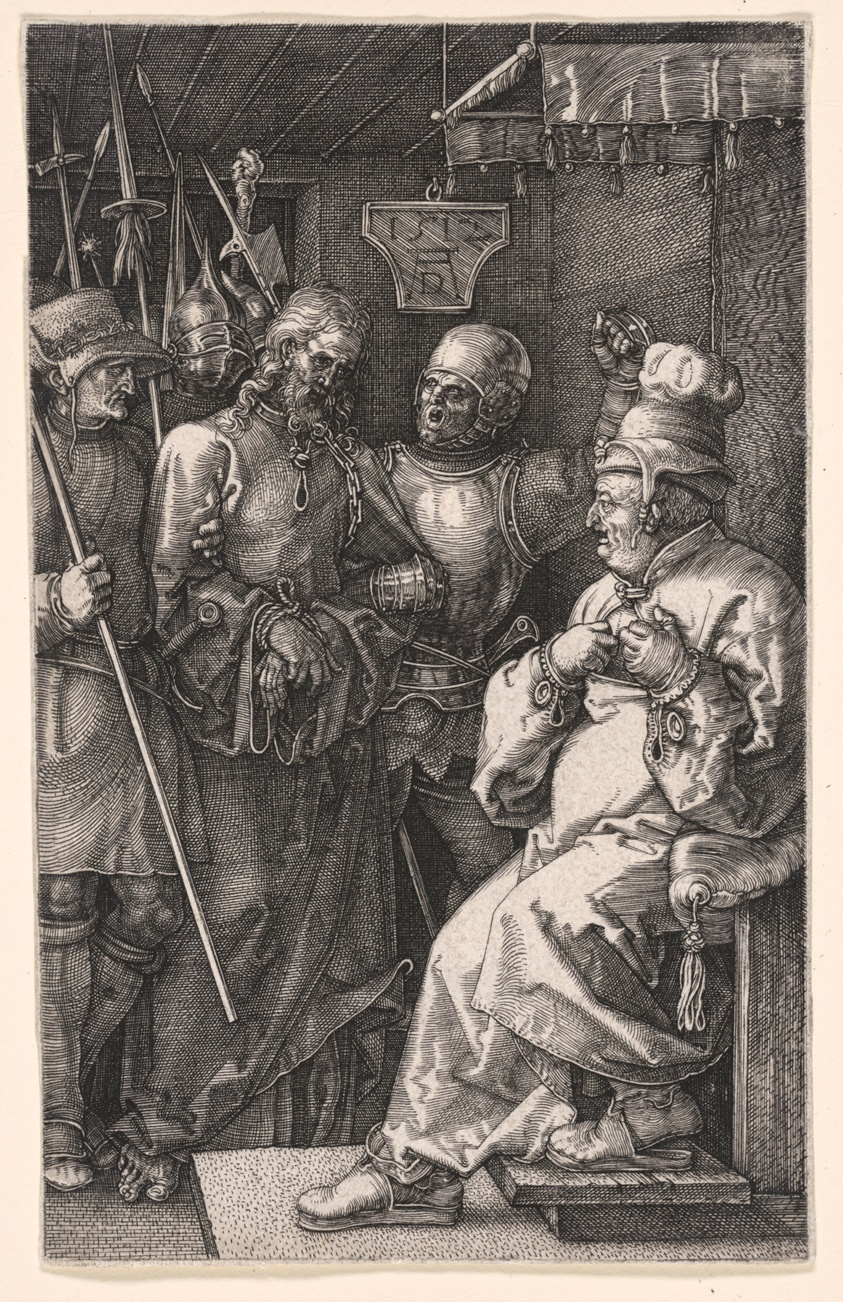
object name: Print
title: Christ before Caiaphas, from The Engraved Passion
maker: Albrecht Dürer (German, 1471–1528)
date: 1512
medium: Engraving on paper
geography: Germany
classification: engraving; paper; print; prints and drawing